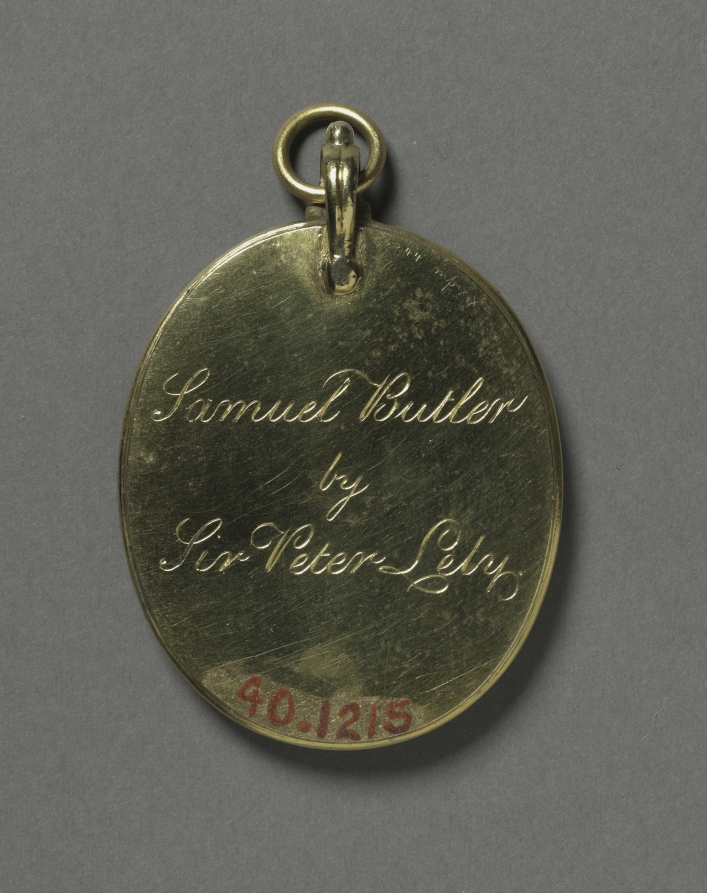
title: Portrait of Samuel Butler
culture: England, early 18th century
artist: Bernard Lens (British, 1681–1740)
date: c. 1715–20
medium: watercolor on ivory in a period metal frame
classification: Portrait Miniature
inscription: signed right: BL [in monogram]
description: Bernard Lens III was the most renowned member of an artist dynasty. His namesake father was a printmaker, his grandfather a painter, and two of his own sons became artists. Lens III was a critical figure in miniature painting as the art form transitioned away from painting on vellum. During the first decade of the eighteenth century, he established ivory as the primary miniature support in Britain, probably having seen the pioneering work of Rosalba Carriera (1675–1757) brought to England from Venice during the flowering of the Grand Tour. The earliest known miniatures by Lens were painted on vellum around 1707, with examples on ivory appearing shortly thereafter. Lens spent his career in London, Bristol, and Bath while also traveling to the country estates of his influential patrons. He was painter to kings George I and George II, as well as drawing instructor to princesses Mary and Louise, the Duke of Cumberland, and Horace Walpole (1717–1797). The sitter, Samuel Butler, turns slightly to the left and has brown eyes. A small portion of his dull red coat is visible, and he wears a white lace cravat twisted around his neck in a loose knot—an essential element of a gentleman’s dress that was fashionable between the 1670s and 1690s and unlike the broad lace or linen collars that dominated in the early and mid-seventeenth century. A long, brown, curled wig falls past his shoulders, and one comma-shaped curl is arranged at the center of his forehead. Butler’s voluminous wig occupies half of the painted surface. During the 1660s gentlemen regularly wore wigs, and while they offered a practical solution to such predicaments as hair loss, graying, and lice, wigs were subject to the vicissitudes of fashion. The wig style seen here is that of the late seventeenth century. Around 1680 it became the norm to part the long wig at the center, which by 1700 resulted in two pronounced tufts on either side, a style not yet exhibited in this portrait. Butler was a poet and satirist popular at the court of King Charles II (reigned 1660–1685). He is primarily remembered as the author of Hudibras, a mock-heroic epic poem satirizing Puritanism written during the English civil war and published between 1663 and 1678.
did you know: Lens often signed his work in monogram; this gold signature is well preserved on this example.